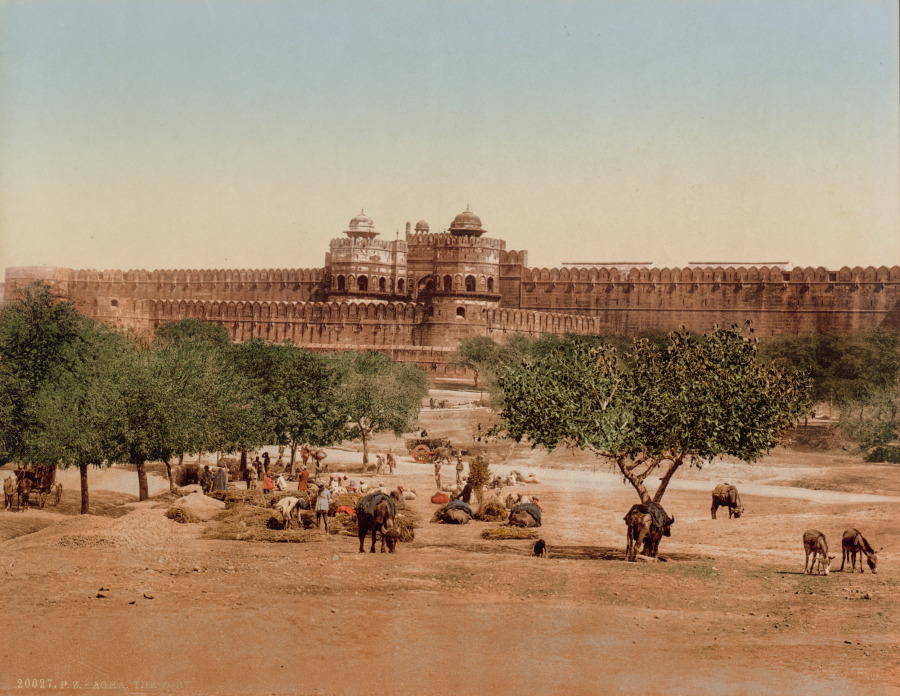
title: Agra. The Fort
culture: India, 19th century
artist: Photoglob Co. (Zurich, active c. 1890–1910)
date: 1890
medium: Photochrom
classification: Photograph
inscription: Imprinted in gold on recto in lower left corner: “20027. P.Z.-AGRA. THE FORT.”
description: Known as the Red Fort because of the rosy sandstone used to build it; the fort was a walled city that served as home to the Mughal emperors until 1638. The height and massiveness of the walls are emphasized by the inclusion of the Indian travelers resting in the foreground.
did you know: It took 1,444,000 builders eight years to build the sandstone fort, which was completed in 1573.